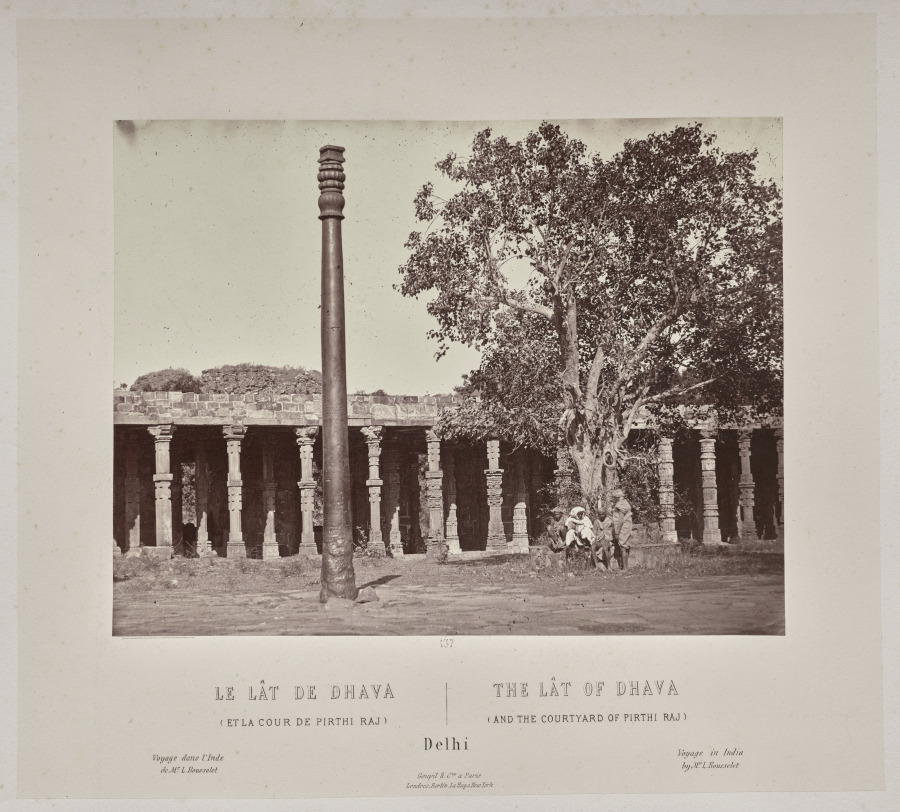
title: The Lât of Dhava and the Courtyard of Pirthi Raj, Delhi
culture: France, 19th century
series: India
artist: Louis-Théophile Marie Rousselet (French, 1845–1929)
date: 1865–68, published 1869–70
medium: Albumen print from glass plate negative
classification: Photograph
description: Concerned that his drawings did not do justice to the splendor of India’s monuments, Rousselet learned photography in India that year, a remarkable accomplishment. He proved to be a talented photographer with a sophisticated sense of composition. The scenes in this volume sweep across sites of Sultanate, Rajput, and Mughal power in northern India, from the sacred Hindu city of Varanasi on the Ganges River to Alwar in Rajasthan. Also included are several scenes of industry and portraits of Indian rulers.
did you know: Louis Rousselet described himself as a “scientific traveler” when he went to India alone at age 18 in 1863 and stayed into 1868.